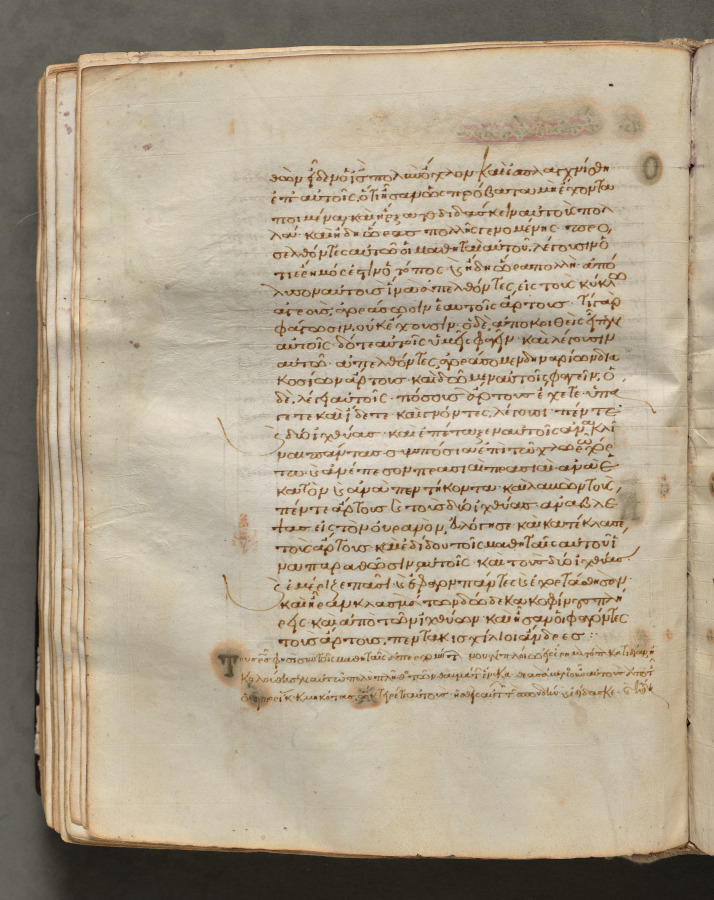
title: Text, folio 152 (verso), from a Gospel Book with Commentaries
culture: Byzantium, Constantinople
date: c. 1000–1100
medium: ink, tempera, and gold on vellum; leather binding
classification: Bound Volume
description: Each of the four gospels in this book opens on a page with brilliantly illuminated borders depicting the author of the text as well as birds-principally peacocks, symbols of the immortality of the soul-and fountains, representing the fountain of life and the salvation of the soul. This volume consists of 428 leaves with texts in Greek. Its level of sophistication suggests that it was probably written and decorated in a monastery in Constantinople.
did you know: Gospel Books were carried in procession through Byzantine churches.